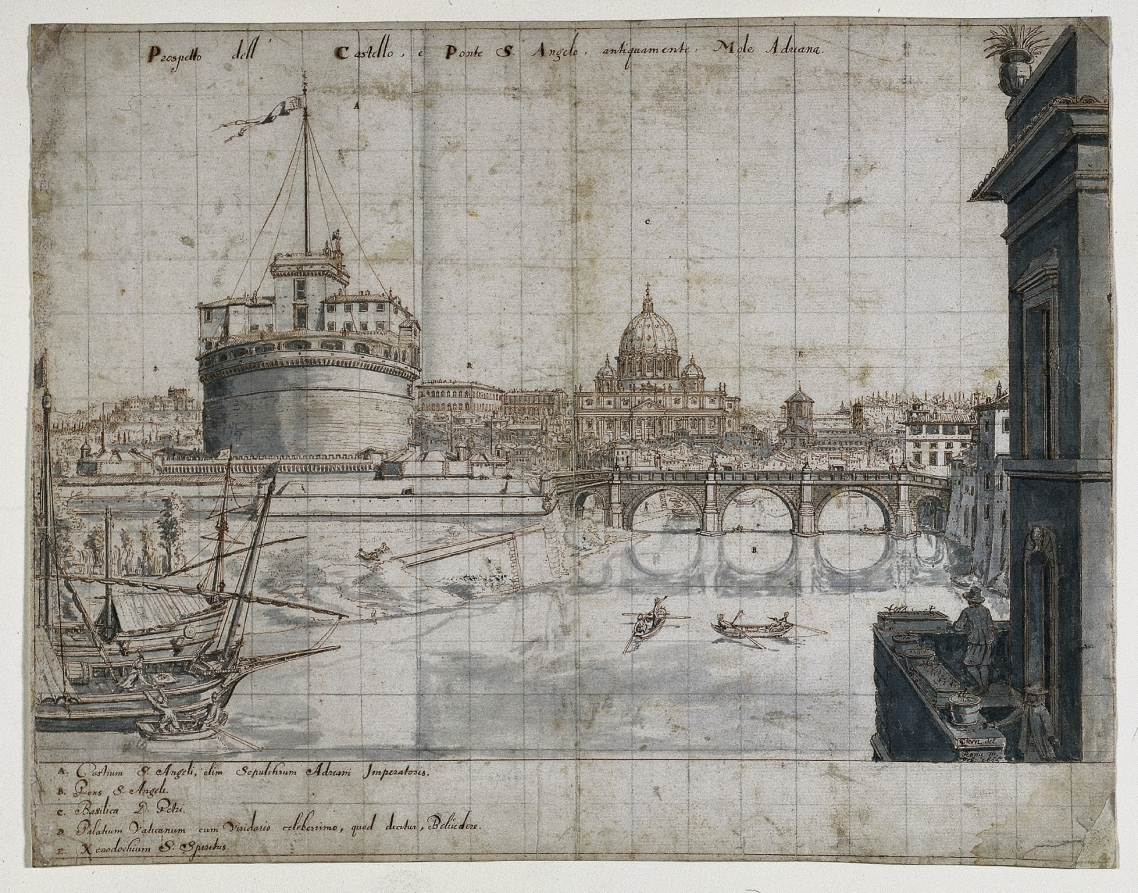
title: Eighteen Views of Rome: The Castel Sant'Angelo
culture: Flanders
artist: Lievin Cruyl (Flemish, c. 1640-c. 1720)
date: 1665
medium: pen and brown ink and brush and gray wash over graphite; squared in graphite; framing lines in brown ink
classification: Drawing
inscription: signed, lower right, in brown ink: [artist's monogram: LC] RVYL del. / Romæ mense / Feb: 1665. ; by artist, upper center, in brown ink: Prospetto dell' Castel, e Ponte S. Angelo, antiquamente, Mole Adriana ; by artist, throughout composition, in brown ink: [the letters A-E] ; by artist, lower left, in brown ink: A. Castrum S. Angeli, olim Sepulchrum Adriani Imperatoris. / B. Pons S. Angeli. / C. Basilica S. Petri. / D. Palatium Vaticanum cum Viridario celeberrimo, quod dicitur, Belvedere. / E. Xenodochum S. Spiritus. ; VERSO, upper left, in brown ink [illegible] [partially masked] ; ON STRIPS OF PAPER MOUNTED TO VERSO, lower center, in graphite: A20985 ; lower right, in graphite: E. 14